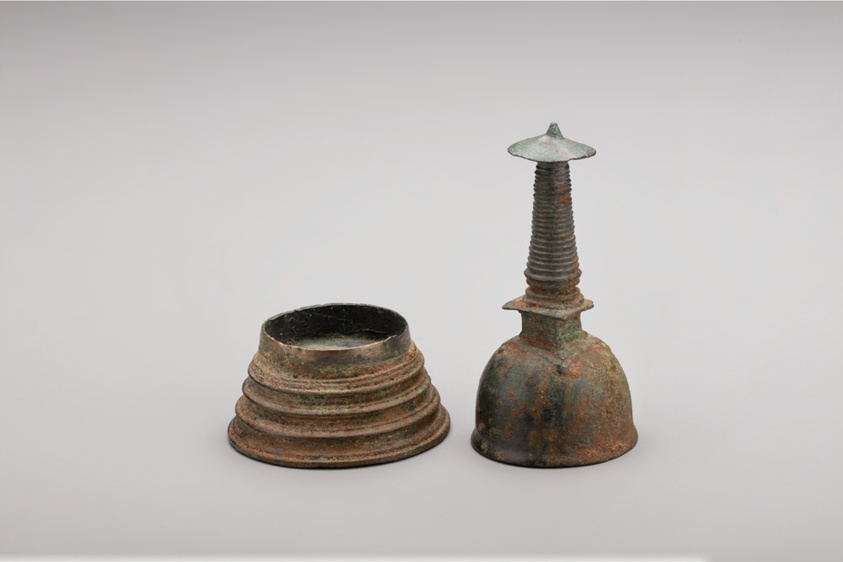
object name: Religious/Ritual Object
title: Stupa Reliquary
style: South Asian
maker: Sri Lanka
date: Polonnaruva period, 12th century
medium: Bronze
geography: Sri Lanka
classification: reliquary; container; bronze; metal; asian art; ritual objects